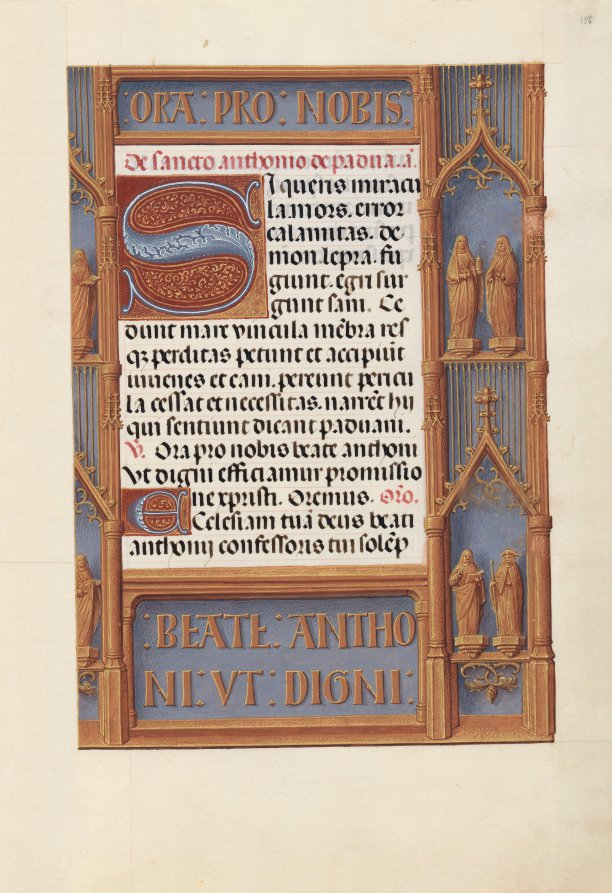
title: Hours of Queen Isabella the Catholic, Queen of Spain: Fol. 188r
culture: Flanders, Ghent and Bruges, late 15th century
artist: Master of the First Prayerbook of Maximillian (Flemish, c. 1444–1519)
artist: and Associates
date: c. 1500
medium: ink, tempera, and gold on vellum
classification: Bound Volume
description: This manuscript was illuminated by a circle of at least five highly organized manuscript painters active in the Flemish cities of Ghent and Bruges. The principal illuminator was Alexander Bening, who painted the majority of the book's miniatures. Manuscripts produced by this circle of artists are renowned for the decoration of their borders, which typically feature a rich variety of realistically-painted flowers, birds, and butterflies. This prayer book, called a book of hours, was intended not for a cleric, but for the private devotions of a lay person-in this case, Isabella the Catholic, Queen of Spain (1451-1504). Isabella's coat of arms embellishes the book's frontispiece. It is unlikely that the book was commissioned by the Queen herself; rather, she probably received it as a diplomatic gift from someone courting her patronage, perhaps Cardinal Francisco Jimenez de Cisneros. A Franciscan friar, Jimenez was dependent upon Isabella for his advancement, first to the post of Queen's confessor in 1492, and then to Archbishop of Toledo in 1495.